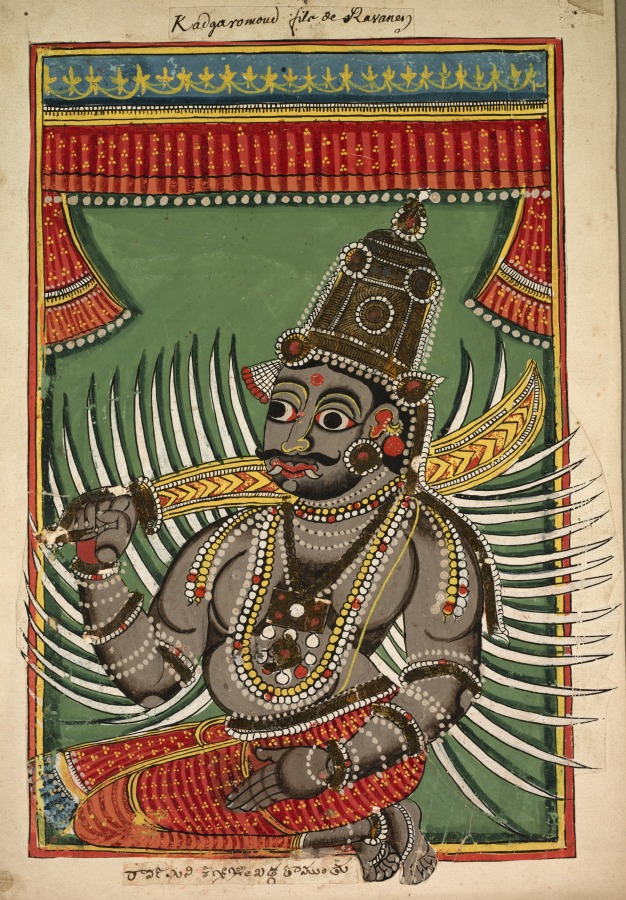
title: Khadgaroma, Son of Ravana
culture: Southern India, Andhra Pradesh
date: c. 1720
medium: Gum tempera, ink, and hand-colored silver paper appliqué on paper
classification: Painting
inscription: [[upper center, in French]] Kadgaromoud fils de Ravanen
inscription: [[lower center, in Telegu]] rāvaṇuni koḍuku [the last two letters are upside down] khaḍgaromuṃḍu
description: Blades fan around the figure of this demon, illustrating the meaning of his name: he whose “body hair is swords.” To further emphasize his favorite weapon, he clutches a broad curving sword in his right hand. The inscription at the bottom identifies him by name in the local language of Telugu, but a section has been pasted upside down, indicating that the owner of this page did not read the script. The inscription has been translated into French at the top. Territories in southern India were under French colonial control from 1692 to 1761.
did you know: The silver appliqué, which was likely mixed with the yellow pigment gamboge, imitates gold.